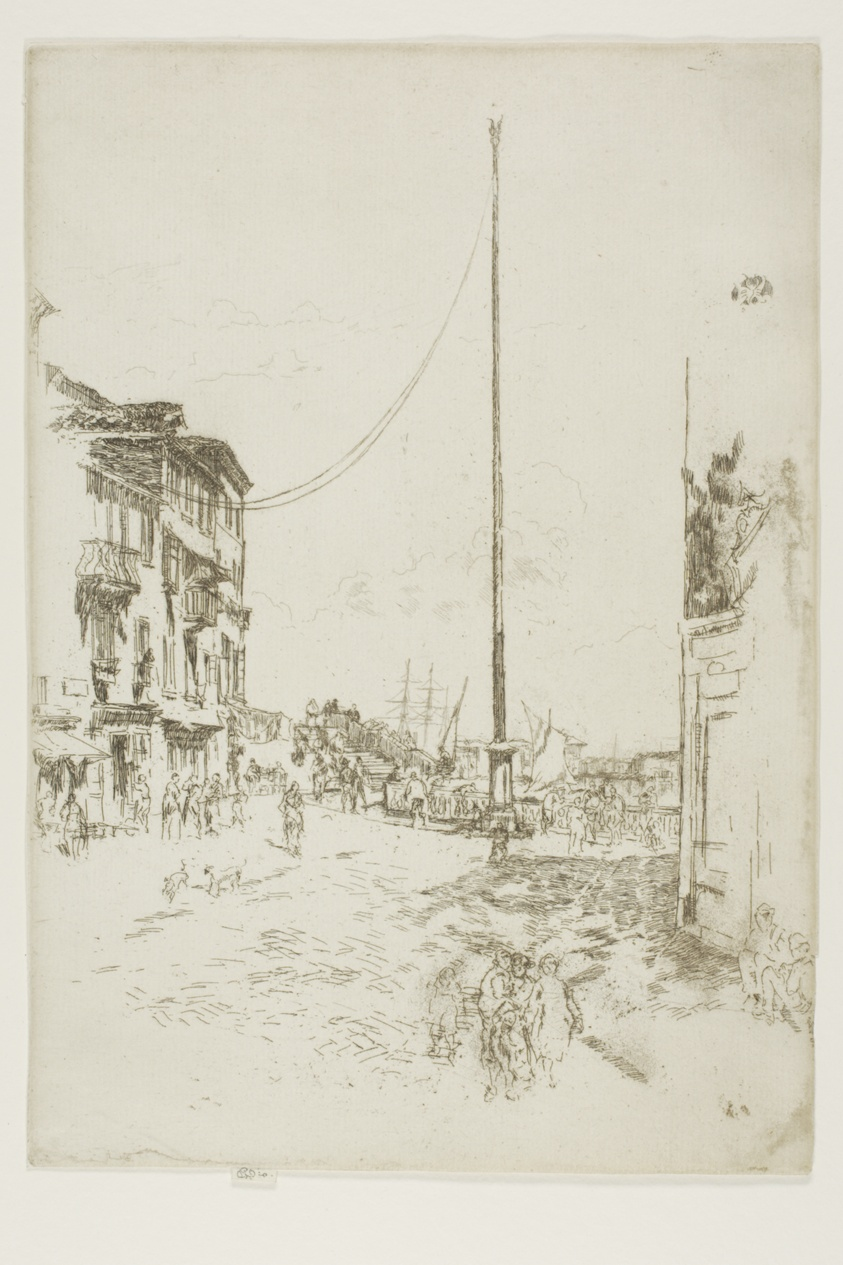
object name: Print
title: The Little Mast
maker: James McNeill Whistler (American, 1834-1903)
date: 1879/80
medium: Etching and drypoint with foul biting in brown ink on ivory laid paper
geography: United States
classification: etching; drypoint; foul biting; print; prints and drawing; paper